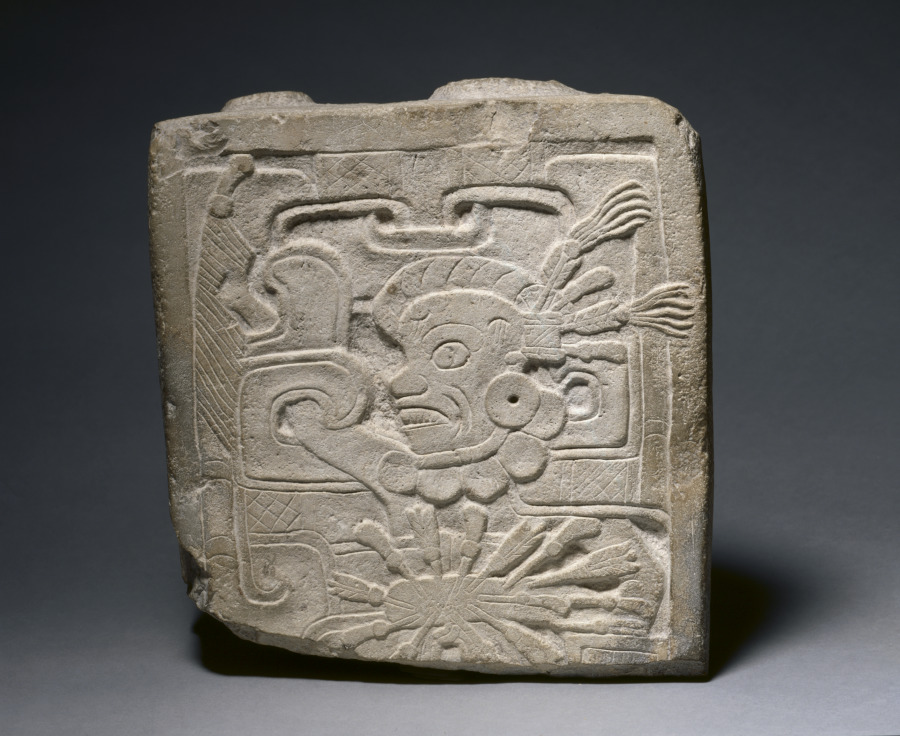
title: Stela Fragment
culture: Mexico, Veracruz?, 600-950 AD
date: 600–950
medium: limestone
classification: Sculpture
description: Figures appear on two sides of this fragmentary stela (upright stone slab carved in relief). One seems to represent a grimacing warrior who brandishes a club; arrow-like darts festoon his belt and hair. On the other side is a skeleton with one fleshed hand, perhaps a sacrificed captive. The eagle with a leaf in its mouth is a hieroglyph that may identify the captive's name.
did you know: The pointed teeth of the warrior are suggestive of dental modification, a practice known to have occurred from human remains.